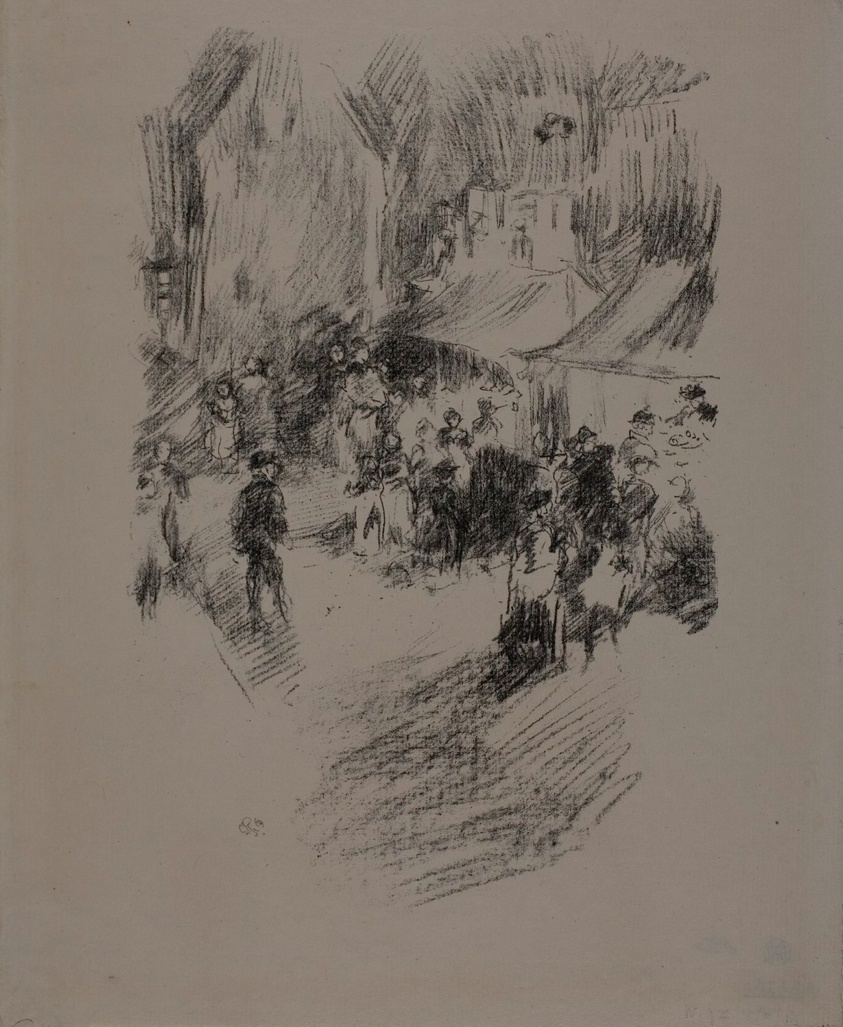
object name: Print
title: The Fair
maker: James McNeill Whistler (American, 1834-1903)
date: 1895/96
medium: Transfer lithograph in black on cream laid paper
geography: United States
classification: transfer lithograph; lithograph; print; prints and drawing; paper